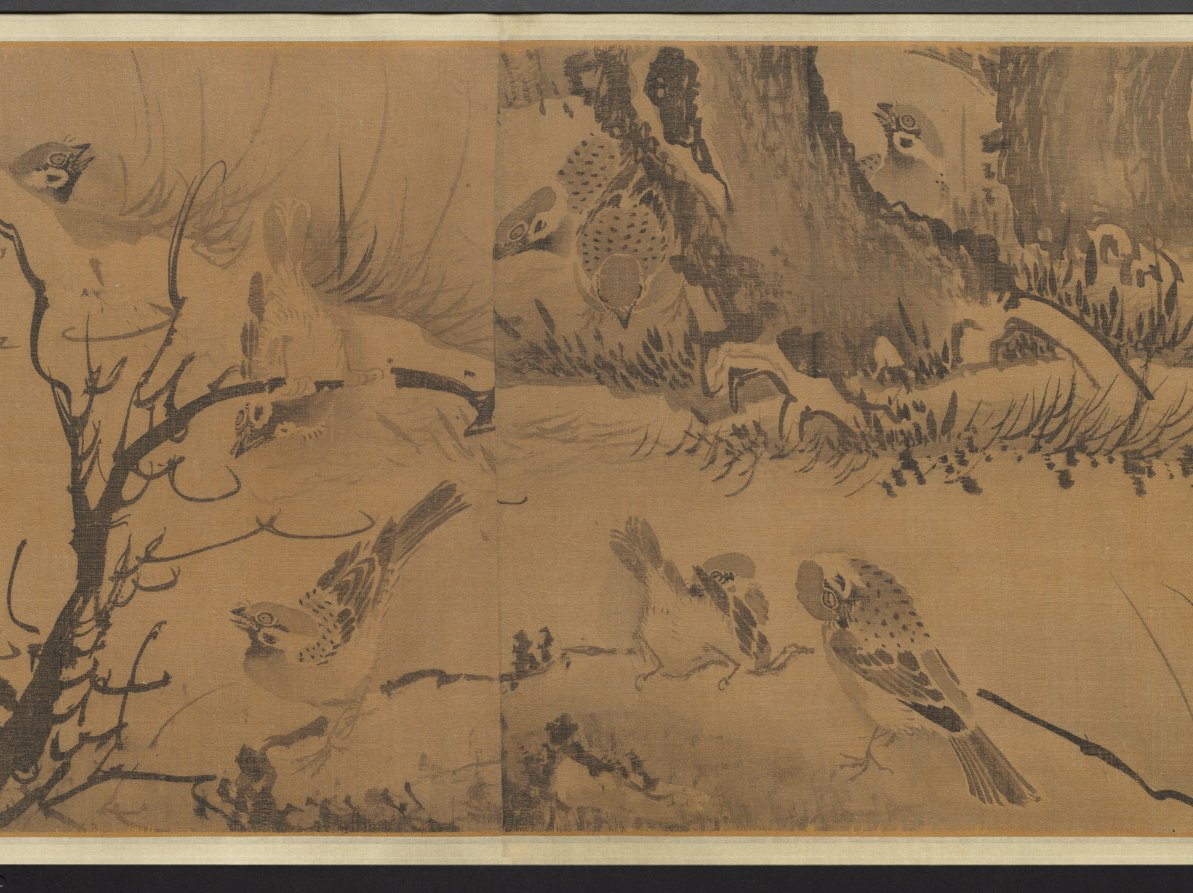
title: A Hundred Sparrows in a Lofty Grove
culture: China, Ming dynasty (1368–1644)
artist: attributed to Lin Liang (Chinese, 1416–1480)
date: 1368–1644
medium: handscroll; ink on silk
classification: Painting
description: Sparrows engaged in all kinds of activities frolic amid leafy branches, blades of grass, rocks, and a waterfall. As our eyes move over the scroll, the artist engages us in enjoying the sparrows’ carefree movements in a natural setting. The charming birds were painted from close observation in swift and fluent brushstrokes. Sparrows are a common bird and in Chinese painting they often represent the commoner in human society as opposed to the noble pheasant or peacock representative of the ruling class.